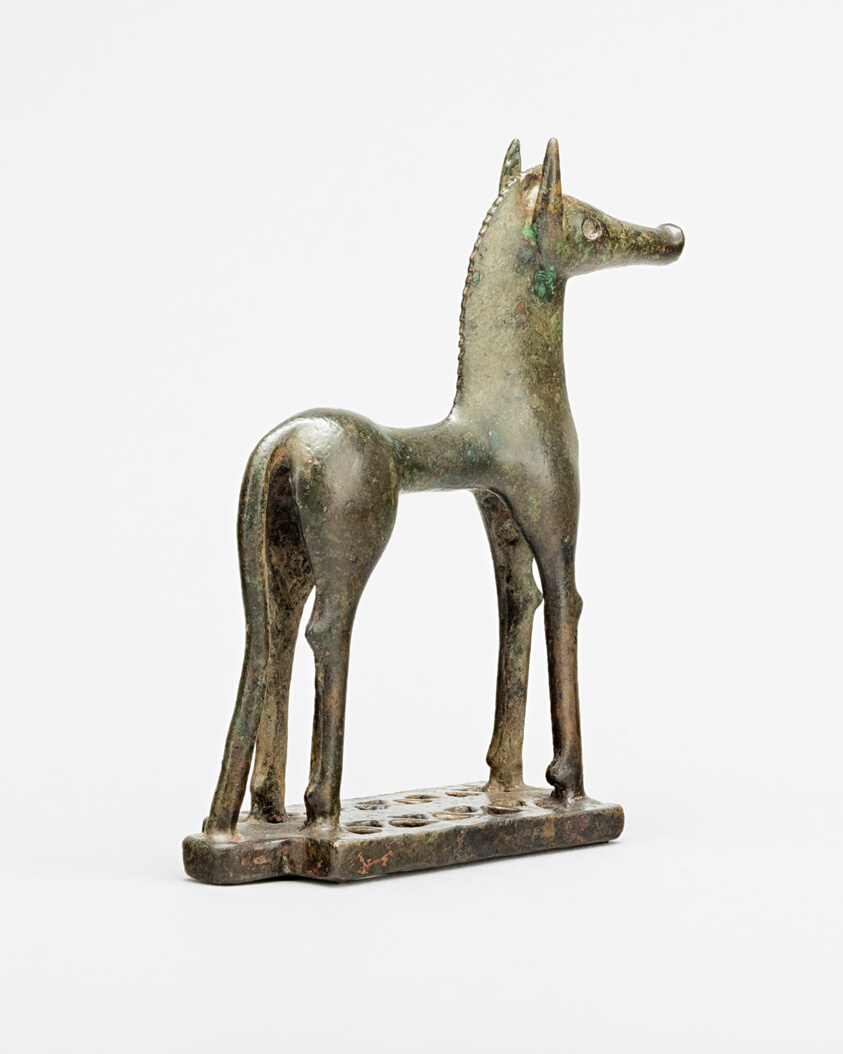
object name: Sculpture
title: Statuette of a Horse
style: archaic (greek), ancient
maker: Greek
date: 750-730 BCE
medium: Bronze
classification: votive offering; ancient art; sculpture; ritual objects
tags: horse, animals